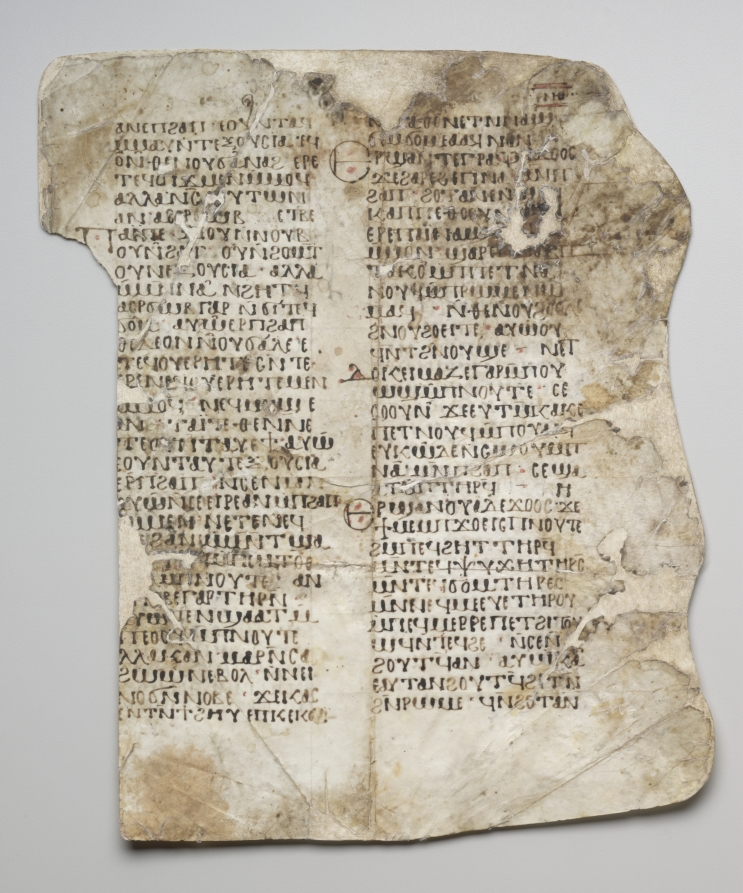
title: Leaf from a Christian Homily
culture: Egypt, Coptic period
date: 500s-600s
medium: ink on vellum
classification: Manuscript